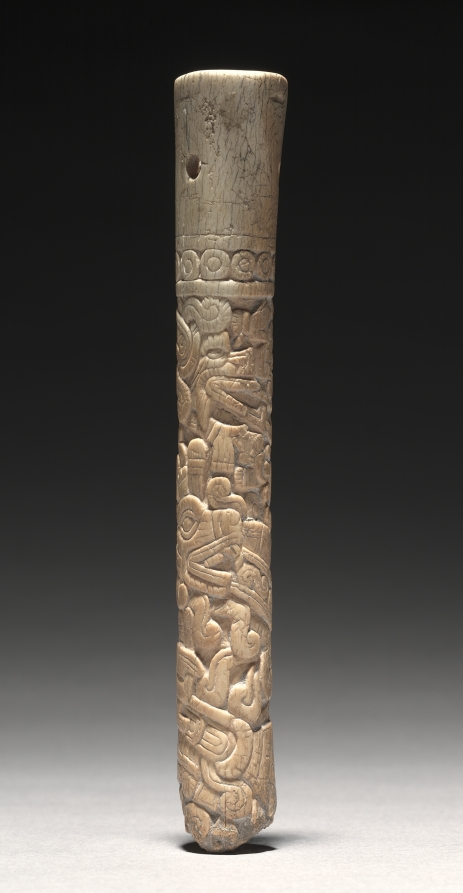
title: Carved Tube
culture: Mexico, Oaxaca, Mixtec, 13th-16th century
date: c. 1200–1519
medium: bone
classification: Jewelry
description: Carved in spiral registers, the ornamentation on this bone tube resembles Mixtec painting, both in codices (screenfold books) and architectural murals.